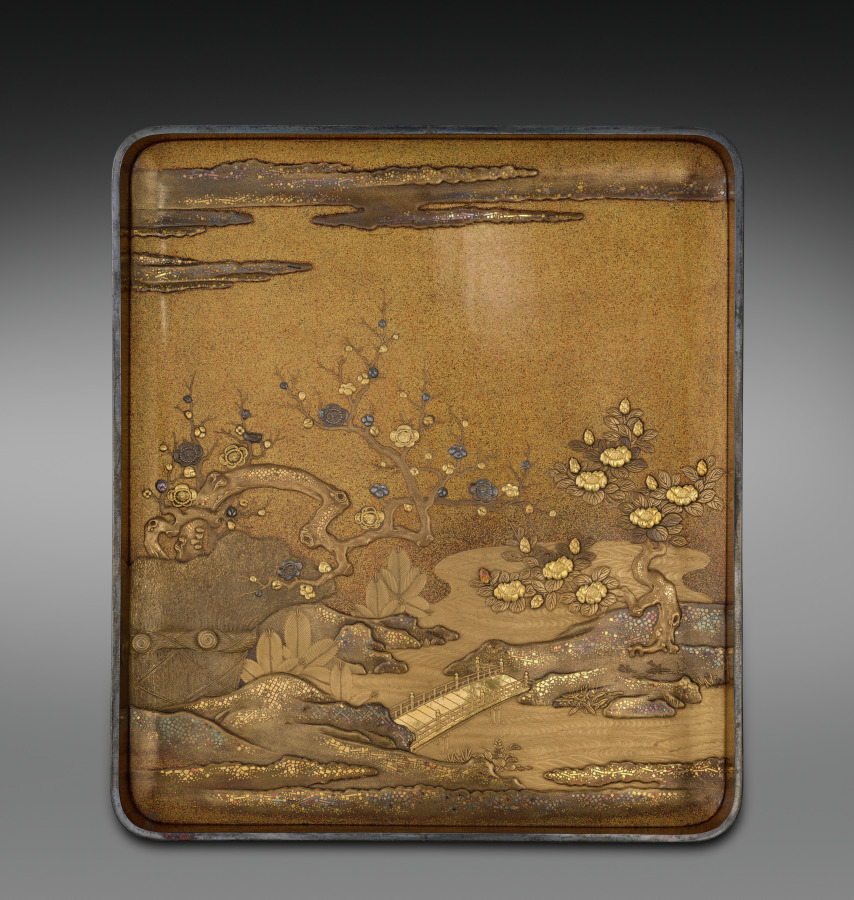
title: Writing Box (Suzuribako) with the “First Song” (Hatsune) Chapter from the Tale of Genji (lid)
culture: Japan, Meiji period (1868–1912)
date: early 1900s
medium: Lacquered wood with gold and silver sprinkled powder (maki-e), foil application (kirikane), and metal inlay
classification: Lacquer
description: The design of this box was inspired by an object in the 1639 lacquer wedding set of Chiyohime, the daughter of the shogun (ruler). Information about the set became available in the Meiji period, leading some lacquer artists to emulate its designs. This box features a scene from the chapter “First Song” (Hatsune) of the Tale of Genji, in which Prince Genji and his love Murasaki enjoy her garden. It incorporates the written characters for “first” (初, hatsu) and “sound” (音, ne), indicating the first song of the warbler in spring, associated with the new year—the water dropper for mixing the ink is in the shape of this bird.